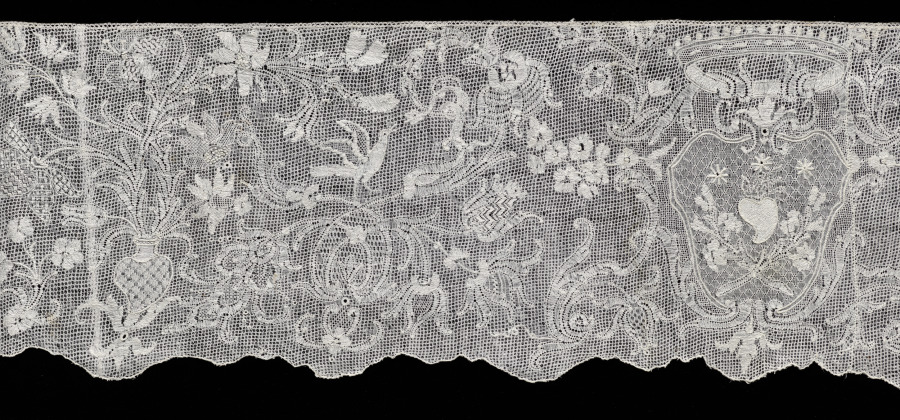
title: Lace Flounce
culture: Belgium, Dinant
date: 1700s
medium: Linen: needle lace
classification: Lace